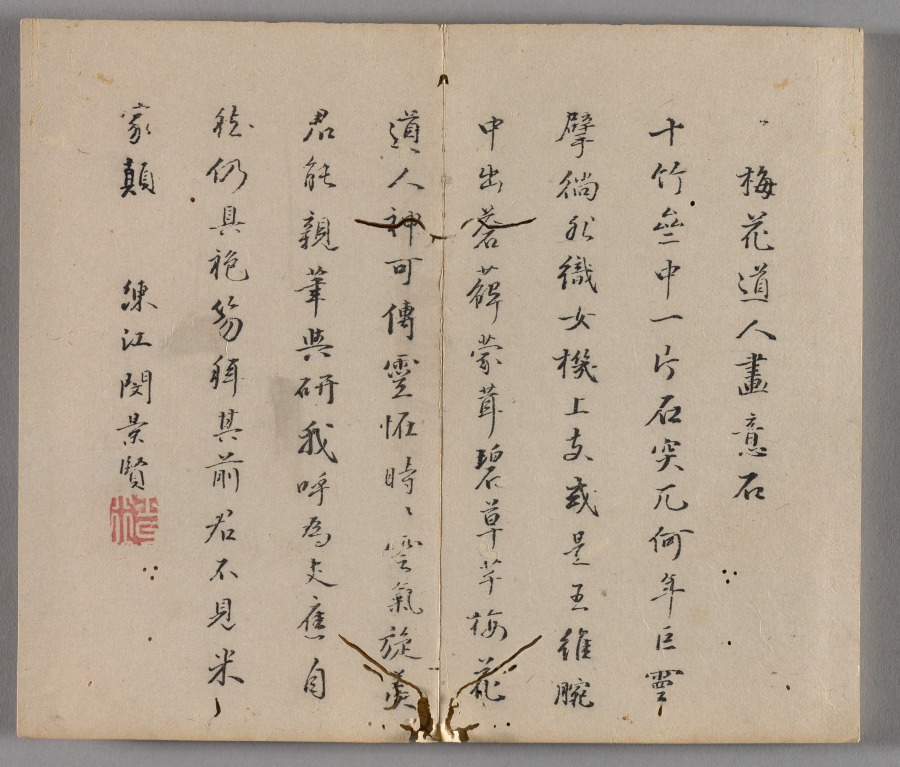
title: Ten Bamboo Studio Painting and Calligraphy Handbook (Shizhuzhai shuhua pu): Rocks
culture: China, Qing dynasty (1644-1911)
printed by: Hu Zhengyan (Chinese, c. 1584–1674)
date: 1633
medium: Woodblock-printed book; ink and colors on paper; first edition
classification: Print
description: Color printing reached a level of perfection in the early 1600s, as seen in this Ten Bamboo Studio Collection of Calligraphy and Painting and the Mustard Seed Garden Manual of Painting (printed 1679 and 1701). The painterly quality, precision in registering (aligning) the woodblocks, and harmonious colors made them the most successful color print editions in Chinese history. Both editions were printed and compiled in Nanjing, spread nationwide, and had a great impact on the arts in Japan and Korea.